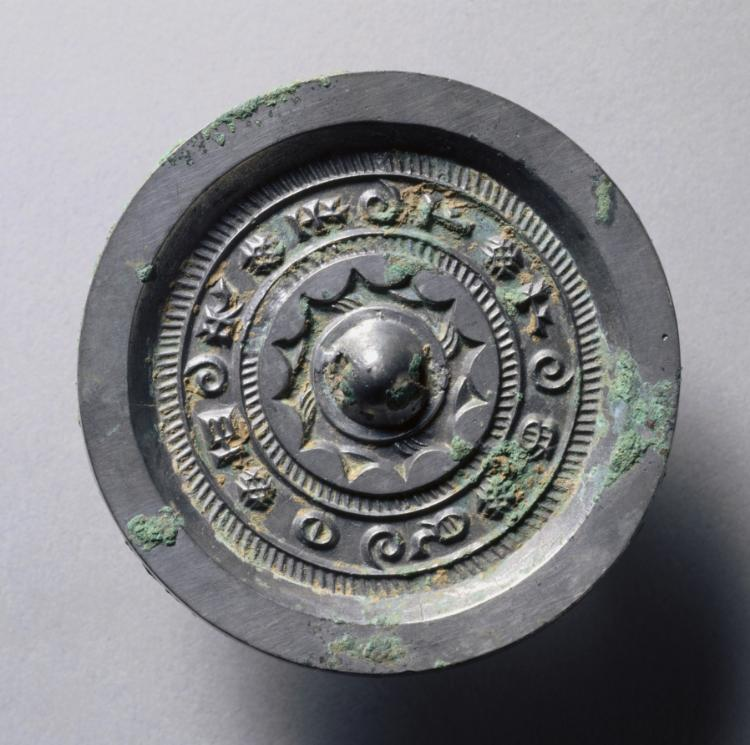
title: Mirror with Concentric Circles and Linked Arcs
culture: China, Western Han dynasty (206 BCE–8 CE)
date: late 200s–9 BCE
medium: bronze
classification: Metalwork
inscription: 見日之光，天下大明。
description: Inscription: By the light of the sun, The world is made bright.